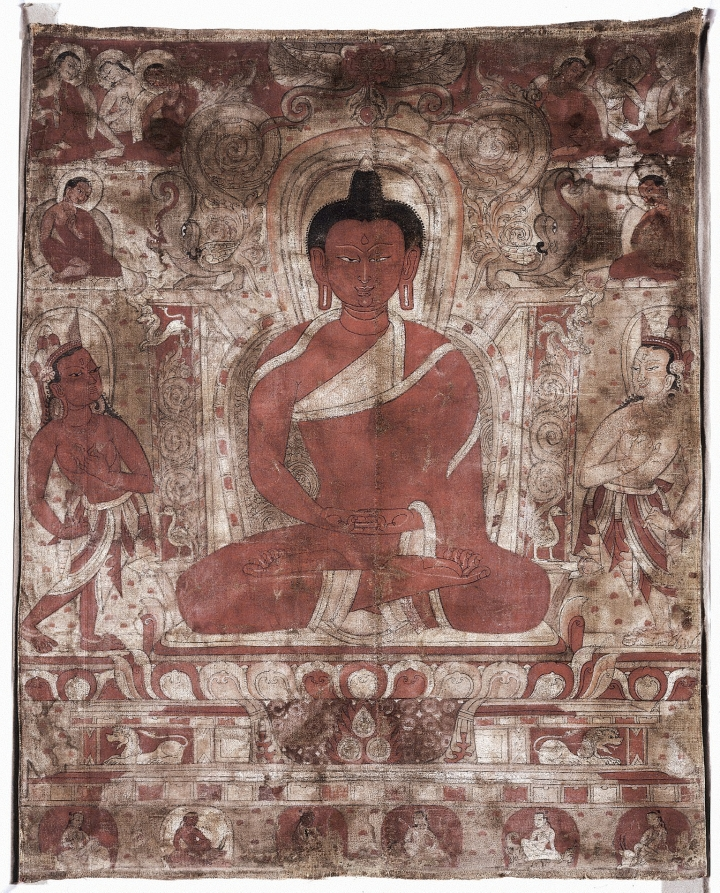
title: Seated Amitabha with Attendants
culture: India, Western Himalayas, Lahul and Spiti, Tabo Monastery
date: c. 1100s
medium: Gum tempera and ink on sized cotton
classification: Painting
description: The red Buddha of the West, Amitabha, seated in meditation on his throne, is flanked by bodhisattvas. Above are two rows of monks who transmit his teachings, and along the bottom is a row of six adepts, skilled practitioners of magic and the recitation of mantras to reach enlightenment quickly. In front of his throne are the three flaming jewels of Buddhism: the Buddha, his teaching (dharma), and the spiritual community (sangha). Its unfinished state reveals the fluid and accomplished ink drawing delineating all the forms. This painting is one of the earliest surviving thangkas—devotional Buddhist paintings on cloth. It is from the region ruled by the Guge kings of western Tibet from the 900s to 1600s, now partially within the national borders of India.